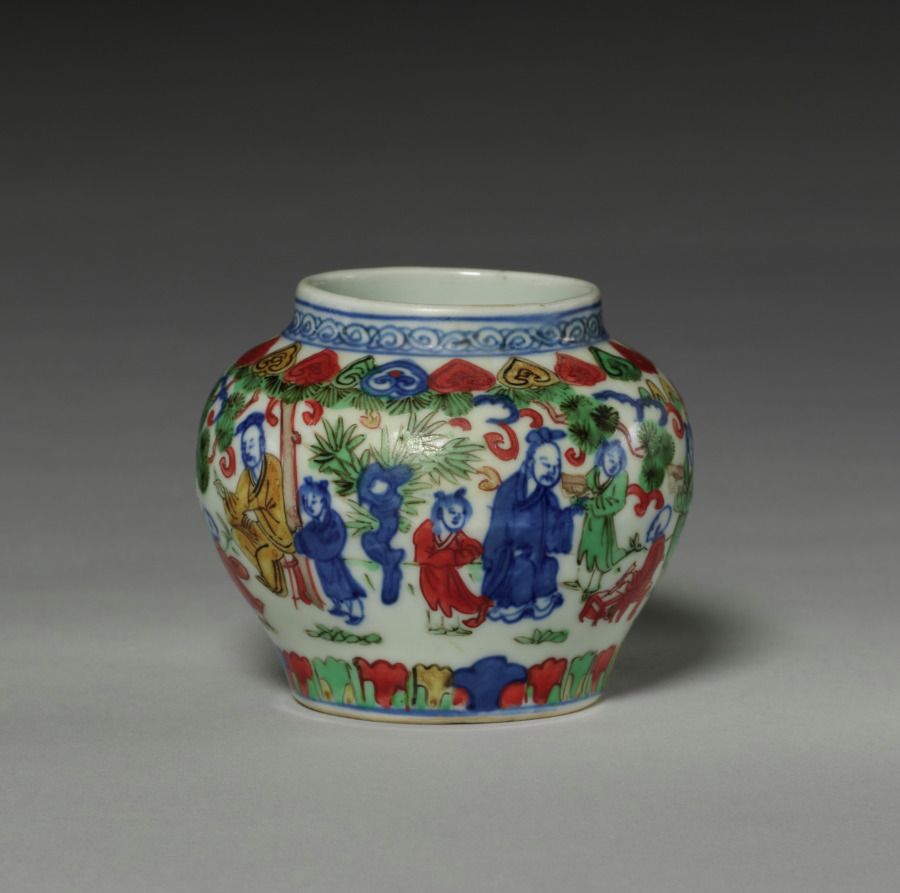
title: Covered Jar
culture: China, Jiangxi province, Jingdezhen kilns, Ming dynasty (1368-1644), Wanli reign (1573-1620)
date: 1573–1620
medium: porcelain with blue underglaze decoration and overglaze enamels in red, green, and yellow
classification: Ceramic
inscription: 大明萬曆年製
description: In the Ming (1368–1644) and Qing (1644–1911) dynasties, luxury items became more affordable to larger parts of the society, including women, merchants, and literati in non-official positions. Imperial patronage and a growing urban population encouraged consumption of luxury goods and local craftmanship. This covered porcelain jar has blue underglaze and overglaze in red, green, and blue enamels. It shows Ming dynasty advancements in porcelain decoration and the creative mind of the talented artisans who made it.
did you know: This jar is painted with 16 figures of all ages enjoying a garden setting.